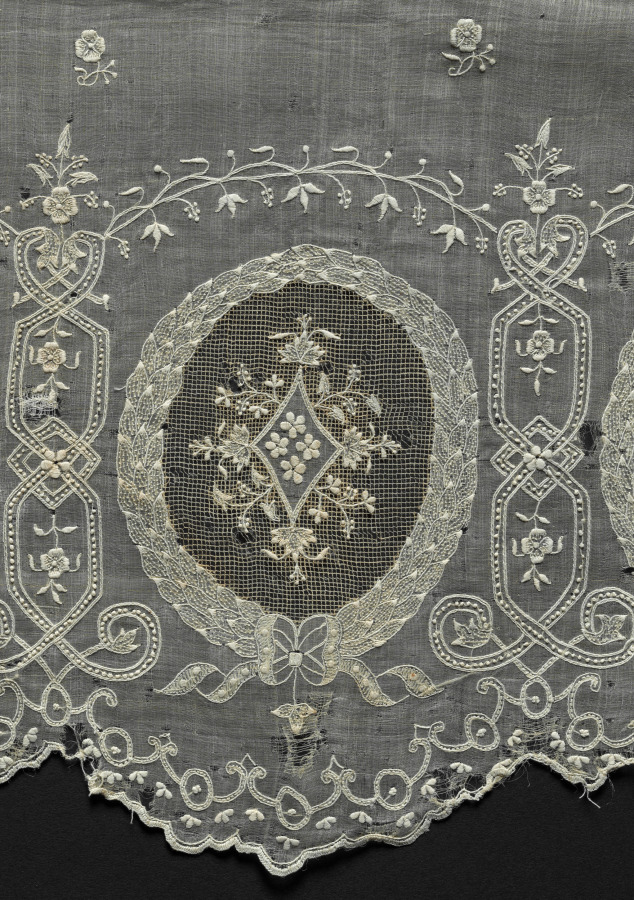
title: Embroidered Textile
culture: Philippines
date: 1800s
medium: Plain weave piña cloth: needle lace and embroidery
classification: Embroidery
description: This rectangular textile is composed of a fine, translucent ground fabric with a scattered pattern of small embroidered floral sprigs. Along the lower edge is a continuous band of oval medallions framed by embroidered scrolling elements, each enclosing a central floral motif executed in calado or another openwork technique. Vertical floral panels separate the medallions, and the edge terminates in a scalloped openwork border.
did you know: This textile may be a fragment from the sleeves of a baro-camisa garment.